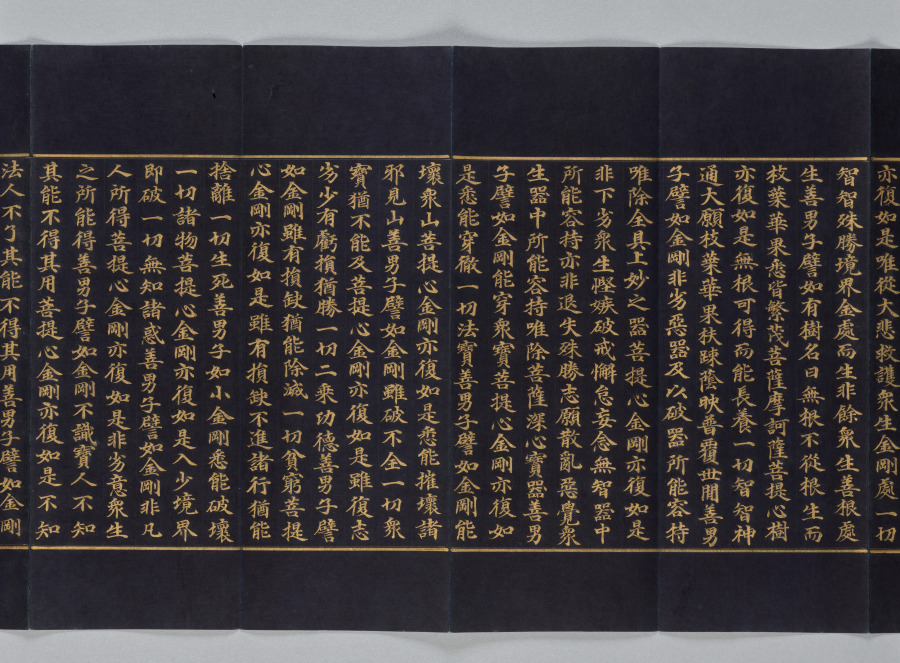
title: Avatamsaka Sutra No. 78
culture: Korea, Goryeo dynasty (918–1392)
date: 1300s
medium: Folded book with illustrated frontispiece; gold and silver on mulberry paper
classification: Bound Volume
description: This illuminated manuscript presents one part of the multivolume sacred text titled Avatamsaka (Flower Garland) sutra. Both the script and the image are rendered in gold ink on the smooth surface of the dark blue, indigo-dyed mulberry paper. This portion of the text, which reads from right to left, describes the encounter of the Buddha of the Future (Maitreya) and the young pilgrim Sudhana. The Buddha gives his words of wisdom to Sudhana, who asks questions about the path toward spiritual awakening. Mixed with ink and glue, the gold has a brilliance that strikingly reflects Sudhana’s ardent quest for understanding the way to reach enlightenment.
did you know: The pristine condition of this manuscript indicates that it was rarely used after its creation, revealing that the act of making a manuscript rather than reading it was the main religious goal.